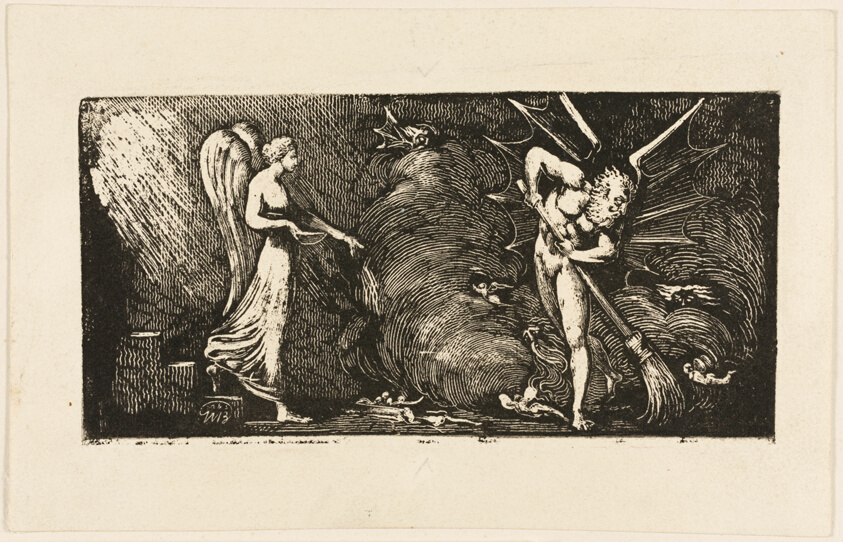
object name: Print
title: 'The Man Sweeping the Interpreter's Parlour,' from Bunyan's Pilgrim's progress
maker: William Blake (English, 1757-1827)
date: 1820–22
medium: Relief etching and white line engraving on ivory wove paper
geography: England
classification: relief etching; print; prints and drawing; paper